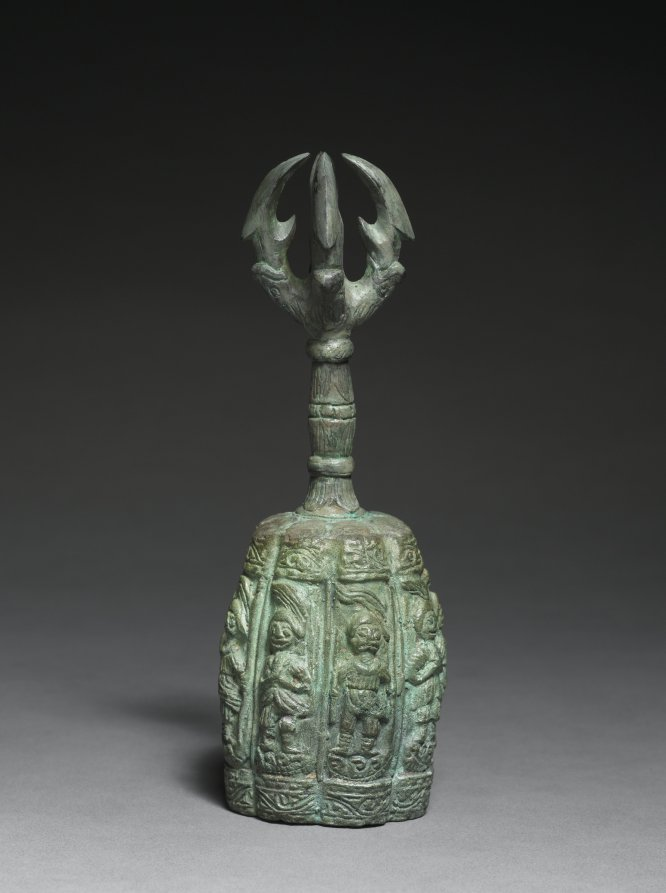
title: Buddhist Ritual Bell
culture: Korea, Goryeo dynasty (918–1392)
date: 1300s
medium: bronze; with incised designs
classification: Metalwork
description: This Buddhist ritual bell is called the "five-pronged" bell due to the four prongs bending toward a central prong at the end of the handle. This shape is a vajra, or lightning bolt, a powerful and important symbol in esoteric Buddhism, which originated in India, spread across Asia, and was practiced in Korea.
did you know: Called a vajra in Sanskrit, this implement is used in Buddhist rituals meant to destroy ignorance.